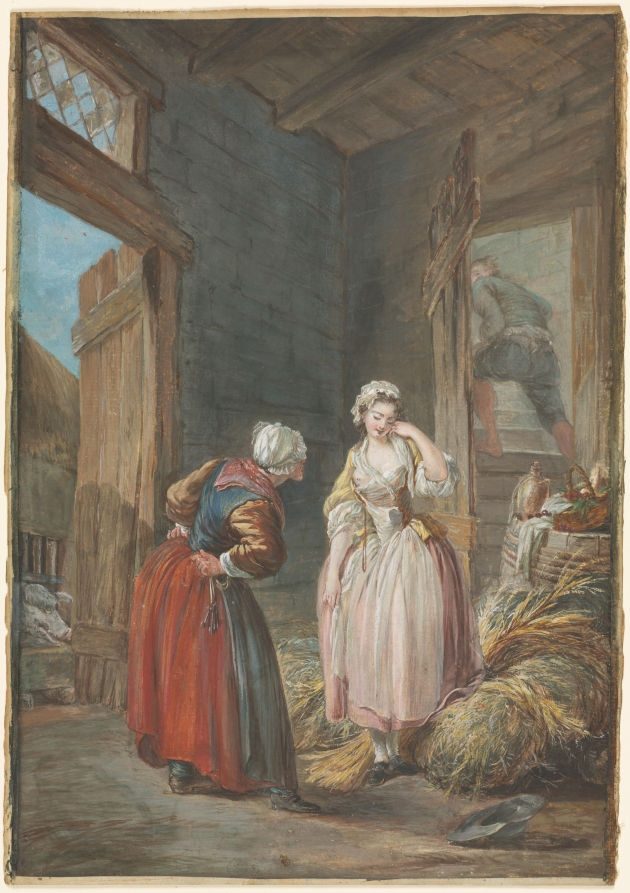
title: The Surprised Lovers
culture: France, 18th century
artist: attributed to Pierre-Antoine Baudouin (French, 1723-)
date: c. 1765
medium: Gouache on card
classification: Drawing